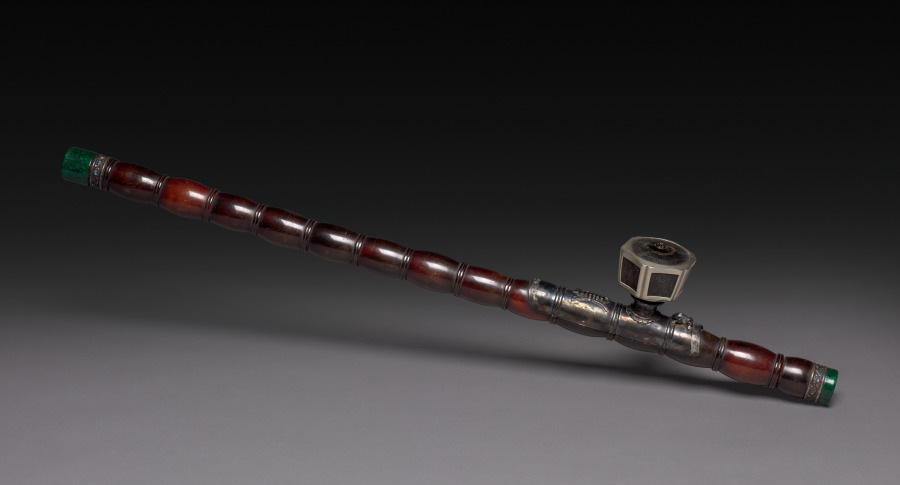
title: Opium Pipe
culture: China, Qing dynasty (1644-1911)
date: 1800s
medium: wood with silver and enamel ferrules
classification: Miscellaneous